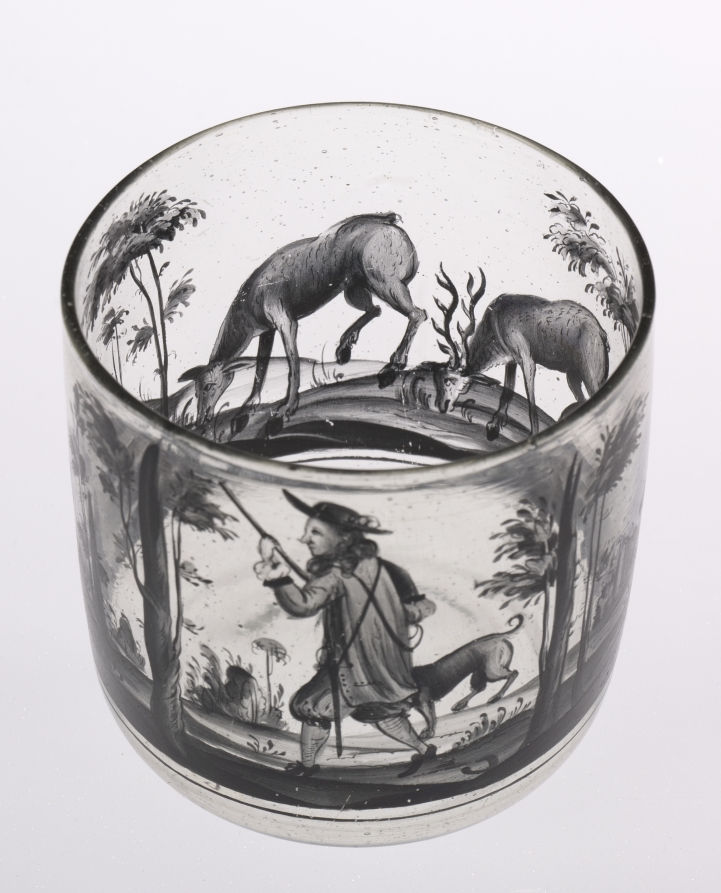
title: Bowl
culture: Germany, mid-17th century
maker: attributed to Johann Schaper (German, 1635–1670)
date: c. 1665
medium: Wheel engraved glass; enamel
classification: Glass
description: Johann Schaper (1621-1670) was a German painter of stained glass, mainly working in Nuremberg and Regensberg, who later turned to decorating glass and ceramics from his home, which was typical of artisans in the 17th century (hausmaler). His style was mainly a linear one in the manner of engravings, and often he worked in black (schwarzlot) or dark colors. Schaper was so influential that other artisans tried to copy his technique, in which he scratched out details with a needle, with varying degrees of success.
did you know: The fine details of the decoration were achieved by scratching away the enamel with a needle.